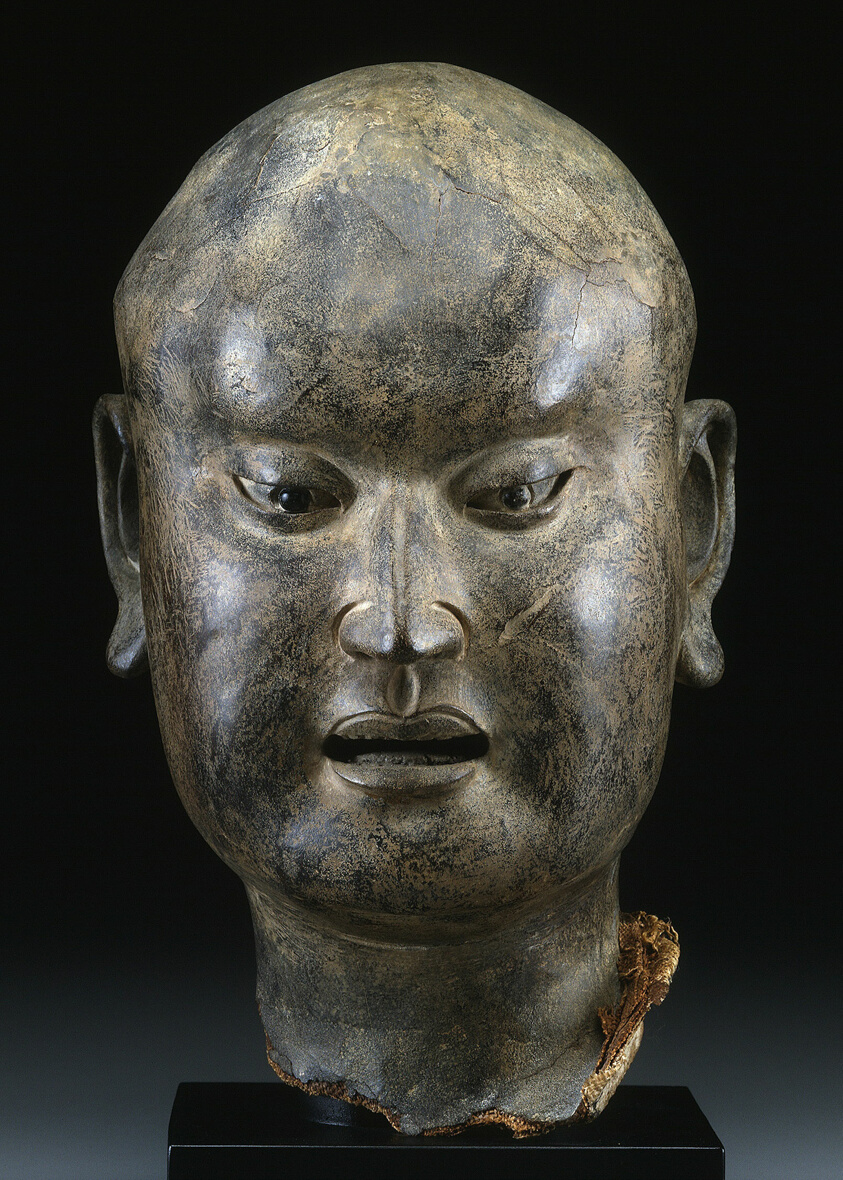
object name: Sculpture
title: Head of a Luohan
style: Chinese (culture or style), northern song, liao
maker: China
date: Northern Song, Liao, or Jin dynasty, c. 11th century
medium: Hollow dry lacquer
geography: China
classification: lacquer; sculpture; asian art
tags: heads, religion, religious figures, Buddhism, Chinese, portraits